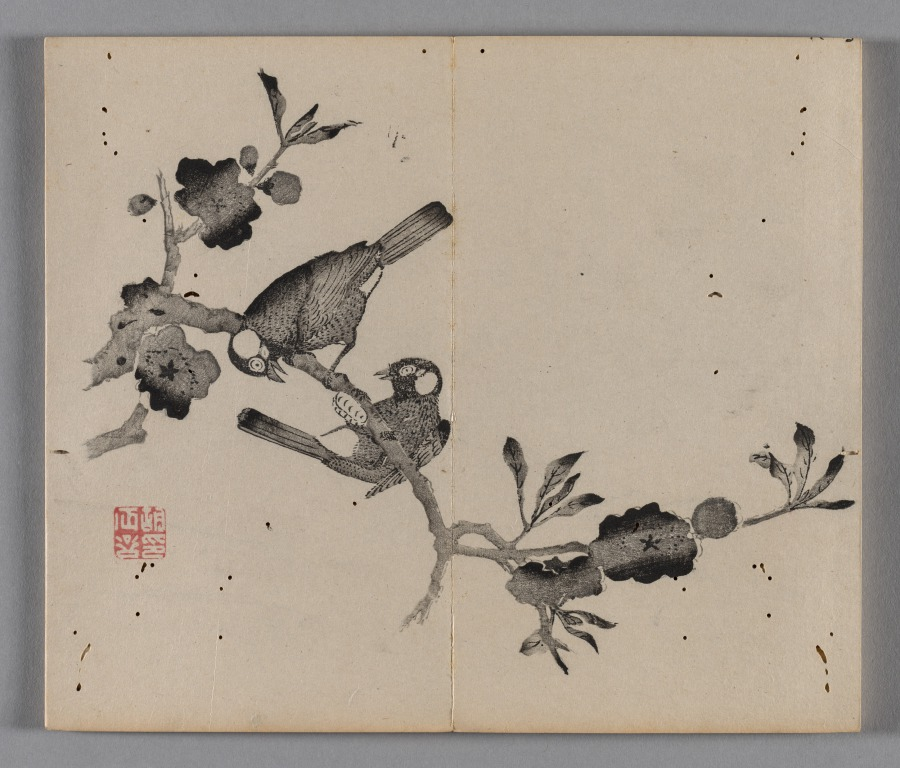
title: Ten Bamboo Studio Painting and Calligraphy Handbook (Shizhuzhai shuhua pu): Miscellaneous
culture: China, Qing dynasty (1644-1911)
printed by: Hu Zhengyan (Chinese, c. 1584–1674)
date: 1633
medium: Woodblock-printed book; ink and colors on paper; first edition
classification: Print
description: Color printing reached a level of perfection in the early 1600s, as seen in this Ten Bamboo Studio Collection of Calligraphy and Painting and the Mustard Seed Garden Manual of Painting (printed 1679 and 1701). The painterly quality, precision in registering (aligning) the woodblocks, and harmonious colors made them the most successful color print editions in Chinese history. Both editions were printed and compiled in Nanjing, spread nationwide, and had a great impact on the arts in Japan and Korea.